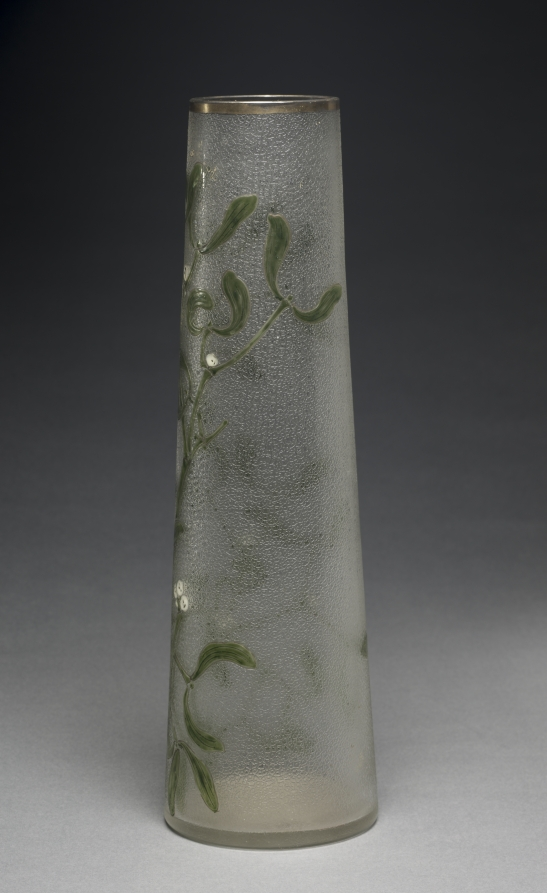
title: Tall Vase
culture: France, Clichy, late 19th-early 20th Century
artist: attributed to Appert Frères (French)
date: c. 1900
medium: glass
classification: Glass